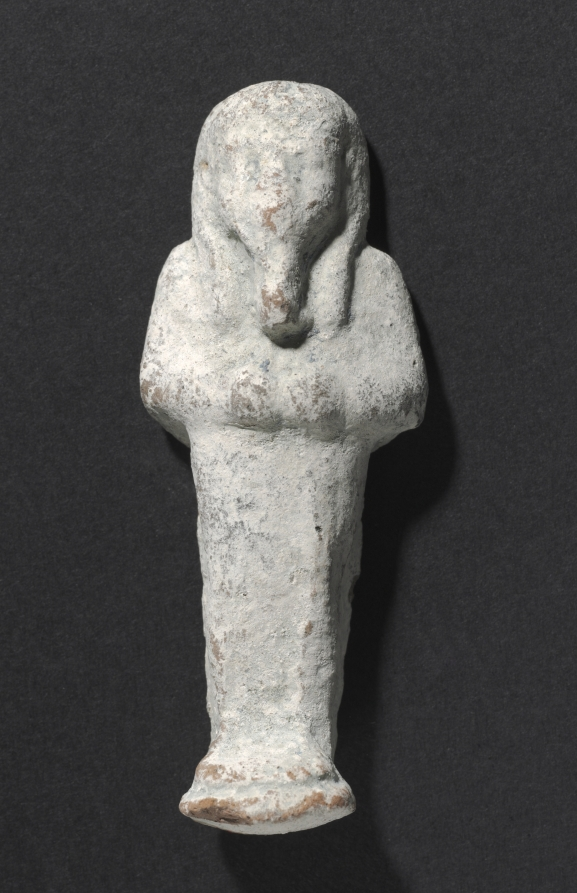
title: Shawabty of Ditamenpaankh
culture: Egypt, Late period (715–332 BCE), Dynasty 25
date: 715–656 BCE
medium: terracotta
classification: Funerary Equipment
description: High demand for shawabtys in the Late Period, a time when as many as 400 or more shawabtys were placed in the tomb with the deceased, gave rise to a specialized container for storing them: the shawabty box. This example is inscribed for the lady of the house, Ditamenpaankh, and was probably one of a pair originally made for her. The single-masted boat on the box's lid is perhaps an allusion to the pilgrimage of the deceased to the holy city of Abydos, the cult city of Osiris, king of the dead. The shawabtys inside are crude, mass-produced examples cast in an open mold. Made of terracotta, their blue paint imitates more costly shawabtys made of faience. As for the shawabty spell, it has been removed from its traditional location on the shawabty's front and relocated onto the sides of box, where it needed only to be written once, thus expediting production.